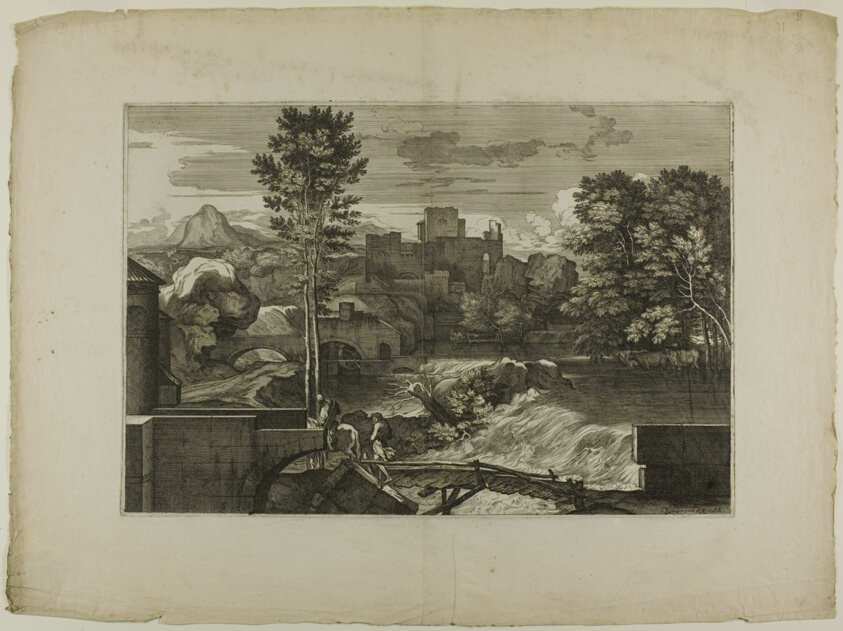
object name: Print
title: Waterfall at a Stone Bridge, with Castle in the Distance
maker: Sébastien Bourdon (French, 1616-1671)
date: 1668–71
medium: Etching on ivory laid paper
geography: France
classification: etching; print; prints and drawing